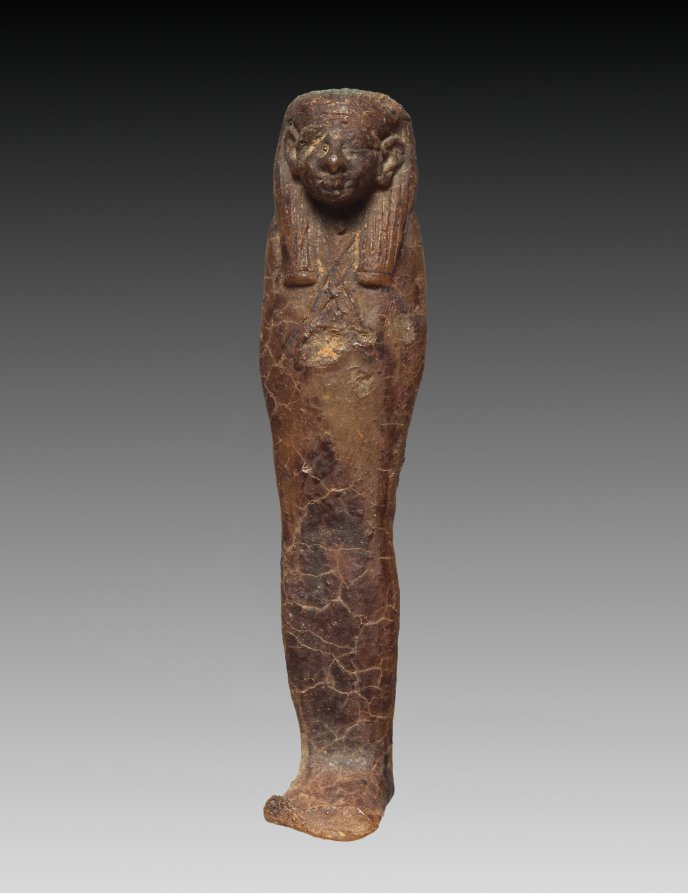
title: Son of Horus: Imsety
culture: Egypt, Third Intermediate (1069–715 BCE), Dynasties 21–22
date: 1000–900 BCE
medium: wax with dark amber varnish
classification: Funerary Equipment